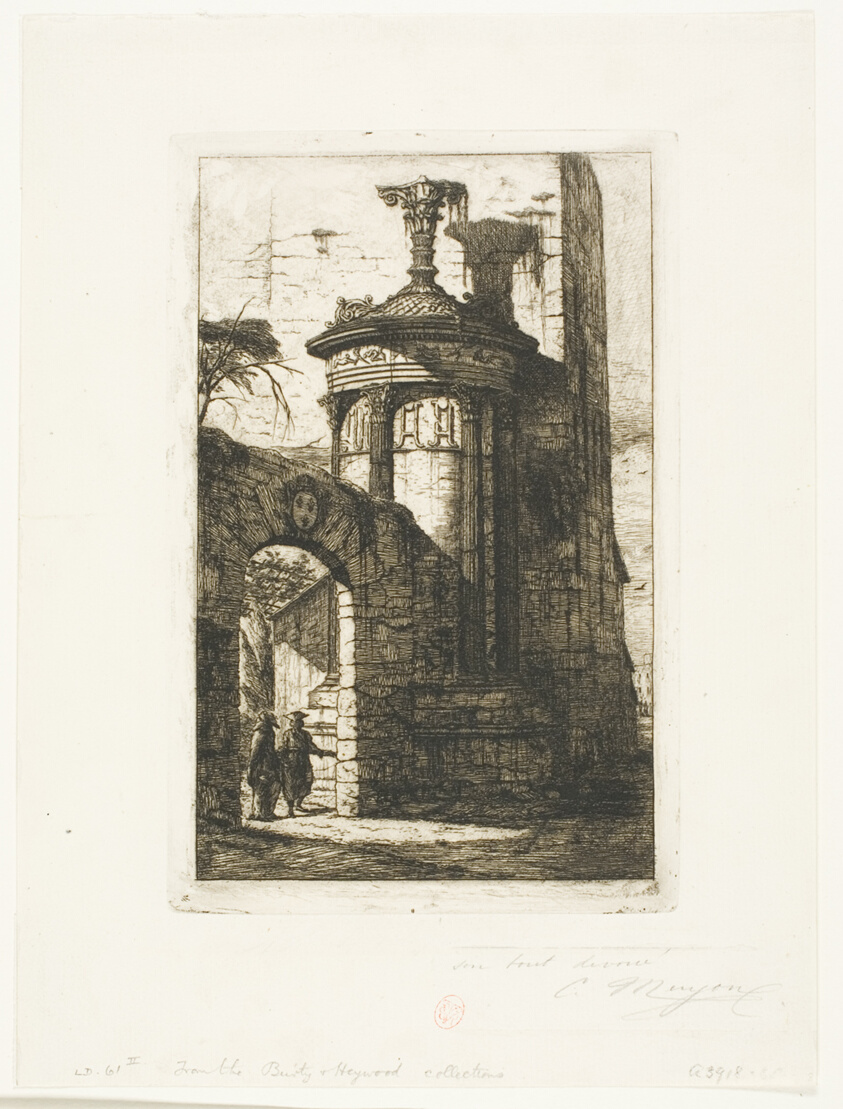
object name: Print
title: Entrance to the French Capuchin Monastery in Athens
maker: Charles Meryon (French, 1821-1868); after Jacques Philippe Le Bas (French, 1707-1783)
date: 1854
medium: Etching and drypoint on ivory laid paper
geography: France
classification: etching; print; prints and drawing